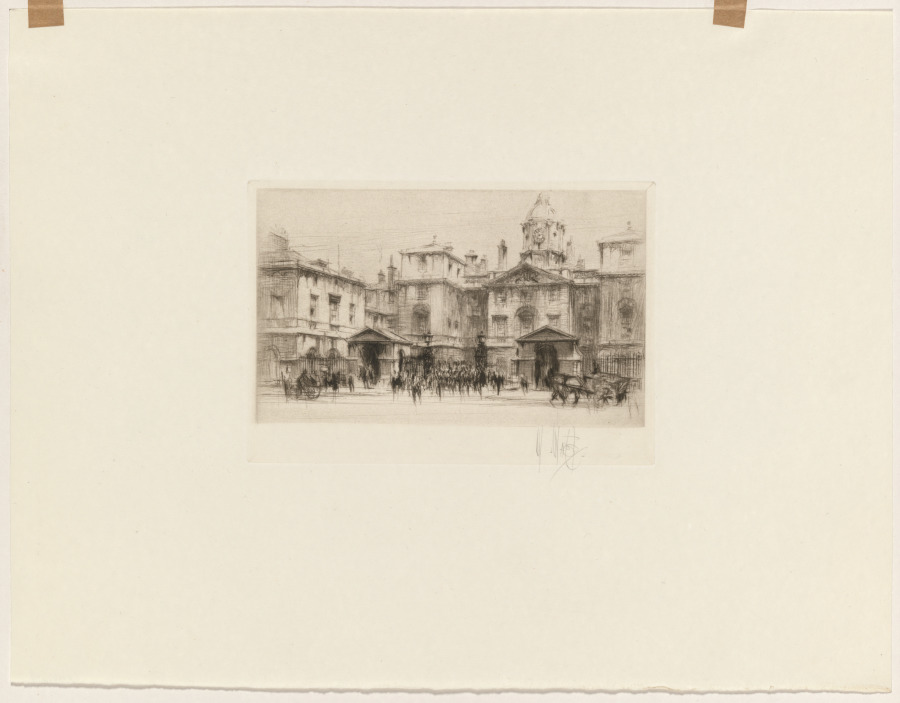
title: London Set: Horseguards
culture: Britain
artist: William Walcot (British, 1874–1943)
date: 1924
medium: etching and drypoint on wove paper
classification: Print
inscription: signed